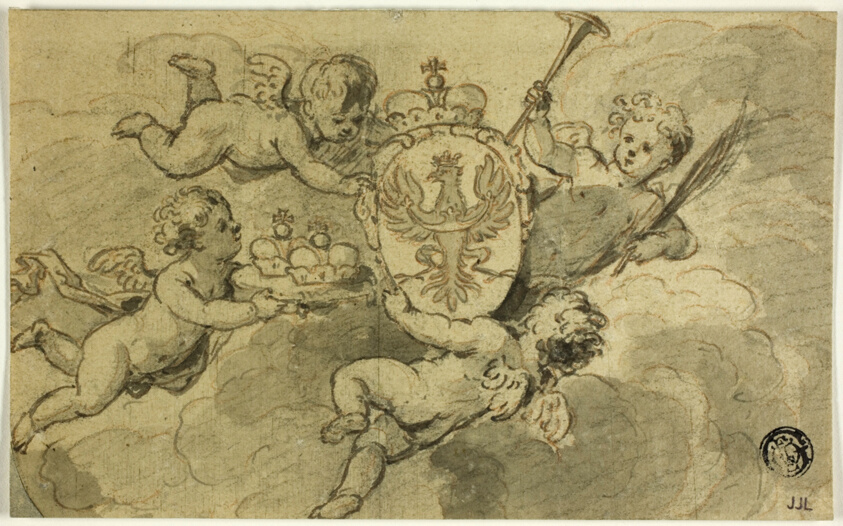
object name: Drawing and Watercolor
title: Putti and Coat of Arms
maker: Gerard de Lairesse (Flemish, 1640-1711)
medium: Pen and gray ink, with brush and gray wash, over black and red chalk, on cream laid paper, laid down on ivory laid paper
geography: Flanders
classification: ink or chalk wash; drawings (visual works); prints and drawing